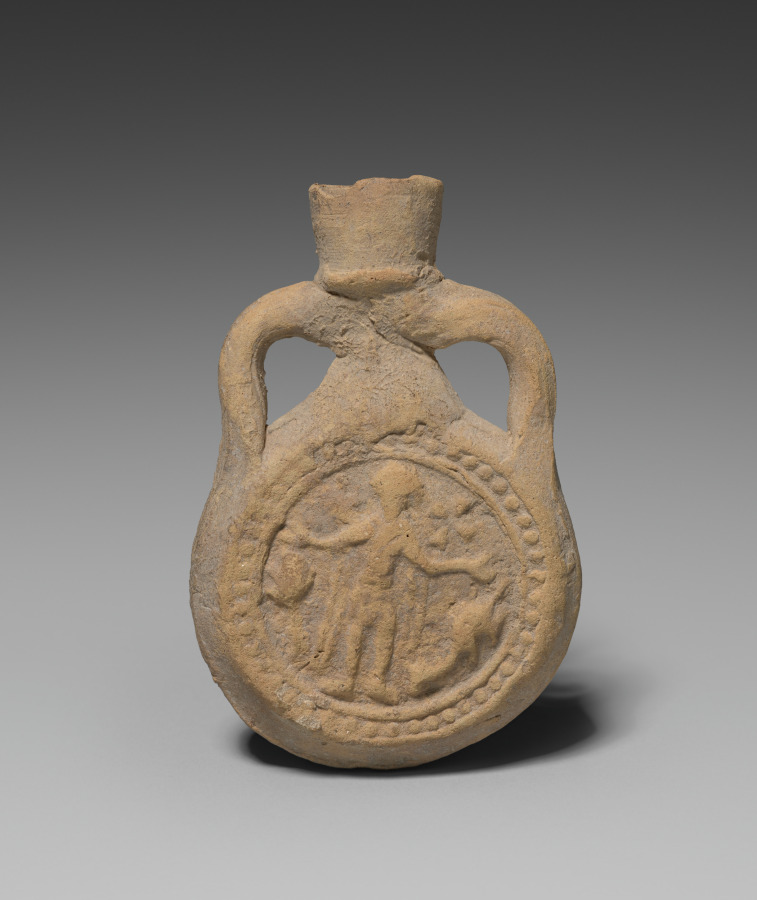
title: Pilgrim's Flask with Saint Menas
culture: Egypt, Coptic period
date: 400–600 CE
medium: terracotta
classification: Ceramic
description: These flasks bear the image of Saint Menas, an early martyr of the Christian Church whose shrine was in the desert southwest of Alexandria in Egypt. These flasks were probably used by pilgrims to hold oil taken from the lamp that burned over this saint's tomb. Probably manufactured near the shrine, pilgrim's flasks often bear decorations hinting at their place of origin, as is the case here.